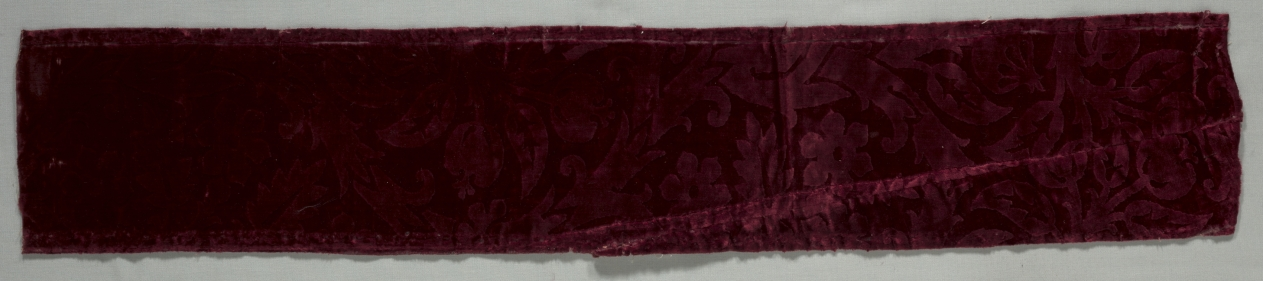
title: Fragment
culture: Italy, first half of 16th century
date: 1500–1550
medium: silk velvet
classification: Velvet